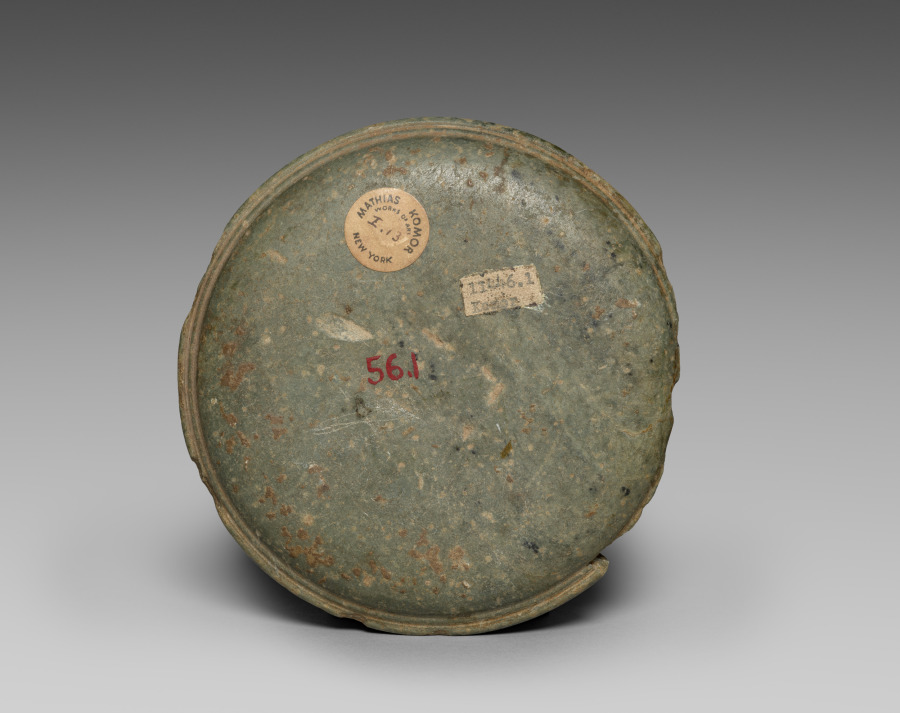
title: Patera with Man Riding Monster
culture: India, Gandhara, Taxila, Palera period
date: 1–200 CE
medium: gray schist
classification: Sculpture